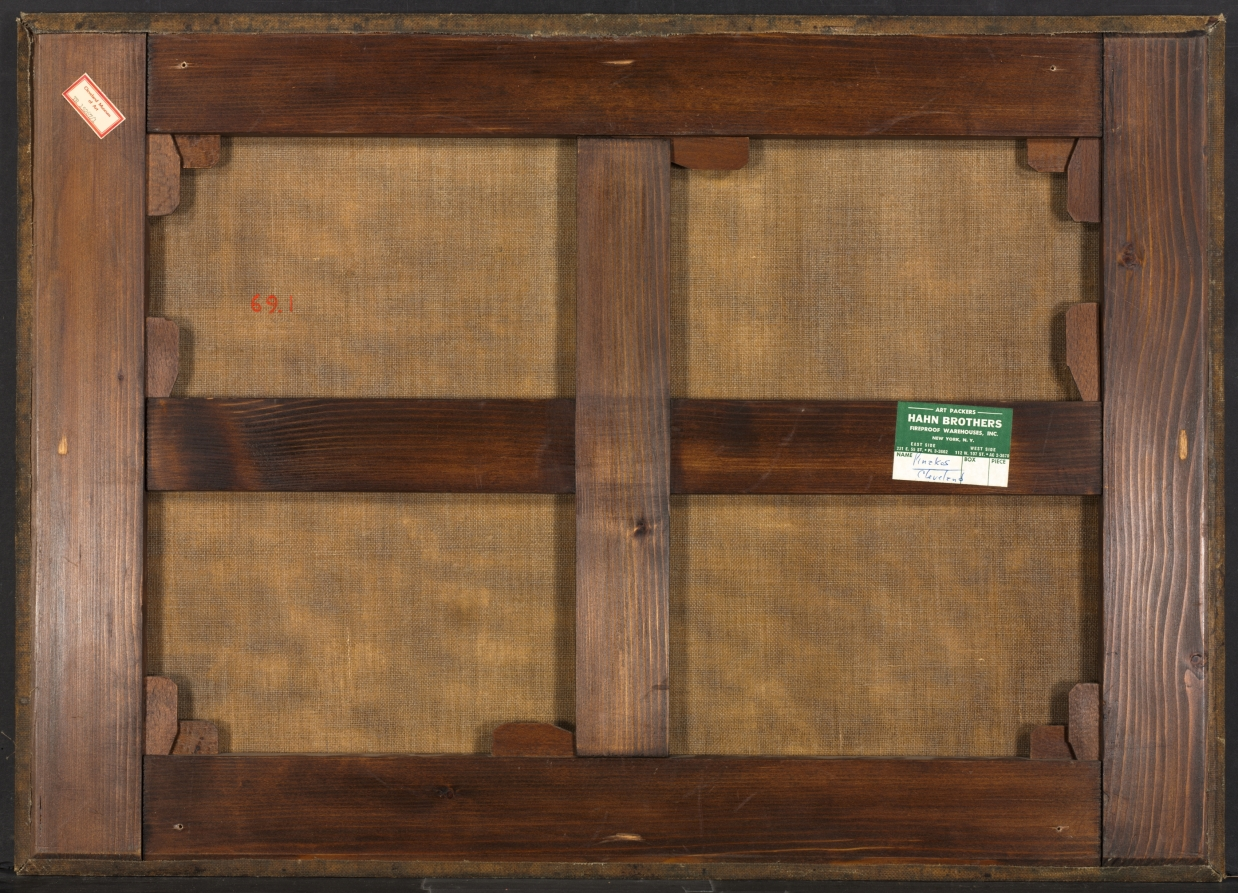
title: The Oath of Abraham’s Servant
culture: Italy, 17th century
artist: Giovanni Benedetto Castiglione (Italian, 1609–1664)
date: c. 1650–59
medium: oil on canvas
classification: Painting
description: This work has long been called Journey of a Patriarch in the belief that the artist intended no specific subject. The painting instead depicts a moment in the Old Testament book of Genesis. Abraham secures a pledge from his servant to find a wife for Abraham’s son Isaac. The servant wears a zamt, a goatskin cap common in North Africa in the 1600s, here dyed an unusual shade of blue, a color associated with faith and trust, symbolizing his sacred oath.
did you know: The musical instrument at the left symbolizes love, foreshadowing the wedding the servant pledges to facilitate.